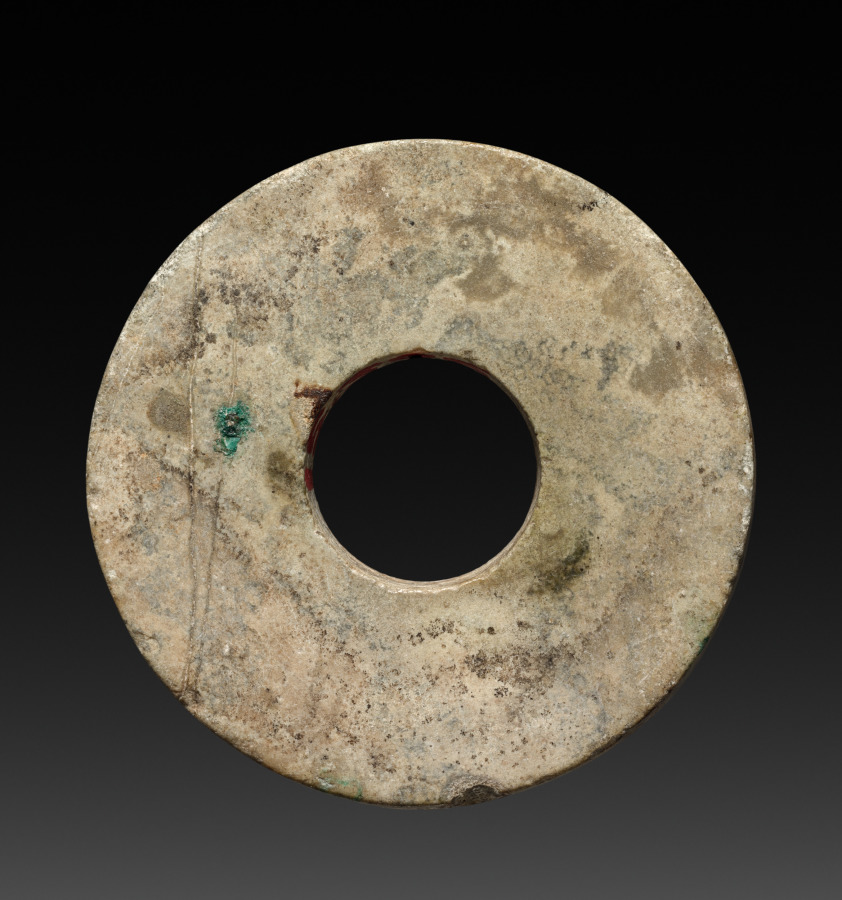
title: Ring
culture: China, Han dynasty (202 BCE–220 CE)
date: 206 BCE–220 CE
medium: jade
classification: Jade